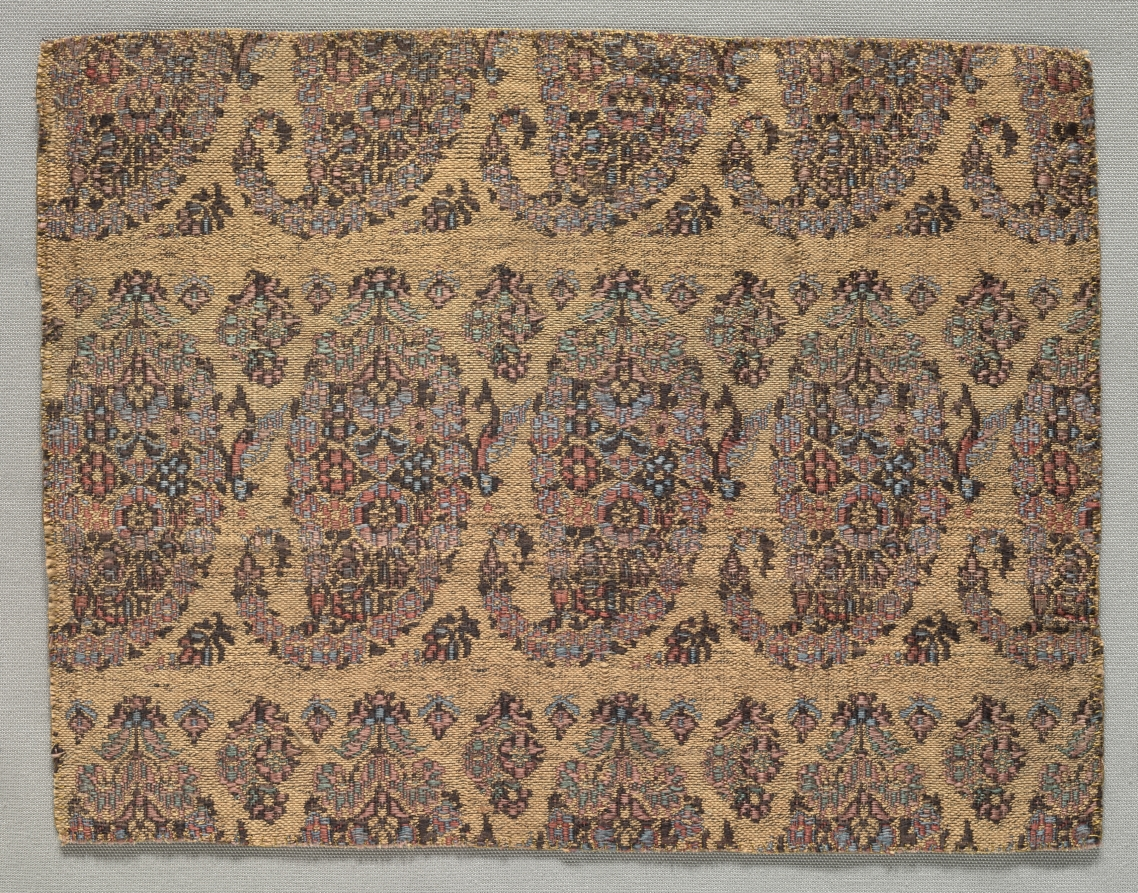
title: Fragment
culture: Iran, 18th century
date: 1700s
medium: lampas weave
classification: Textile